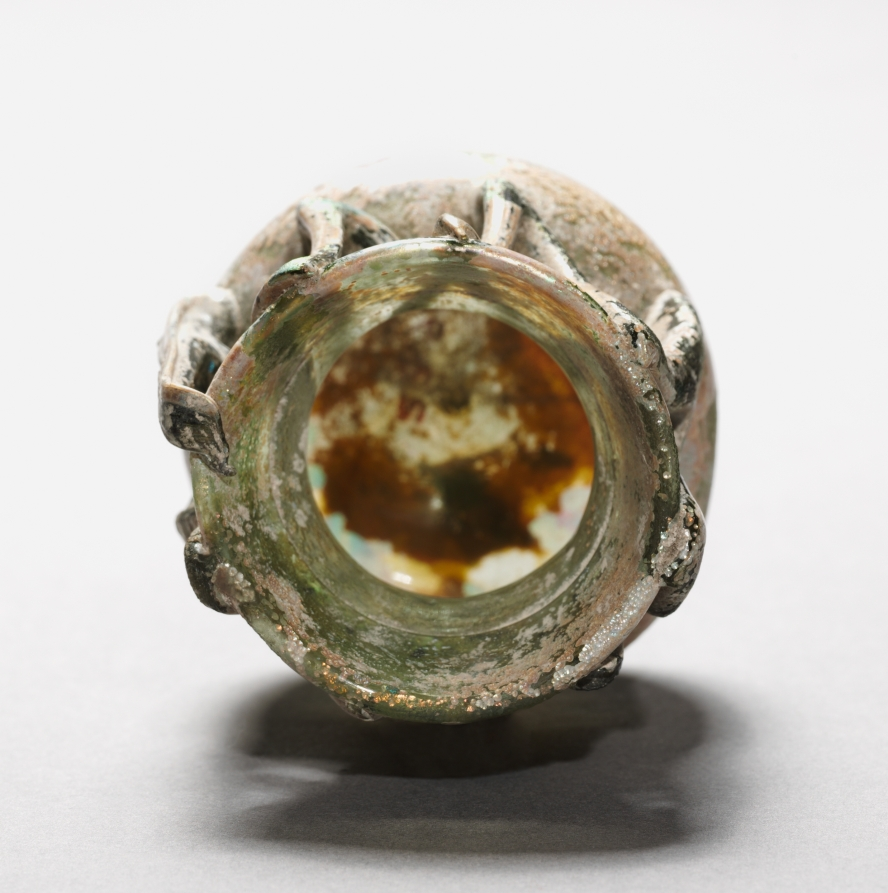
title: Vase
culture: Italy, Roman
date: 100–300 CE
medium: glass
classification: Glass